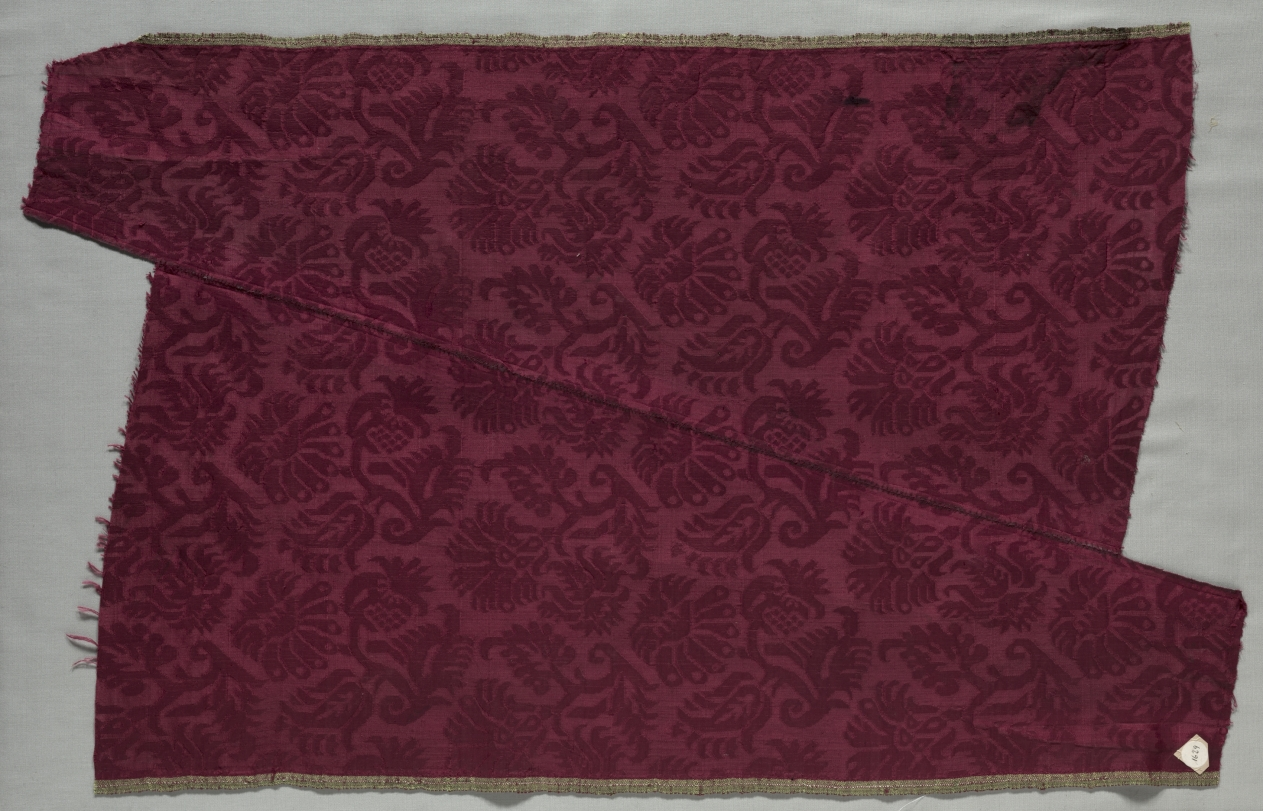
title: Length of Silk Damask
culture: Italy, 17th century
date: 1600s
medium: damask, silk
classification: Textile